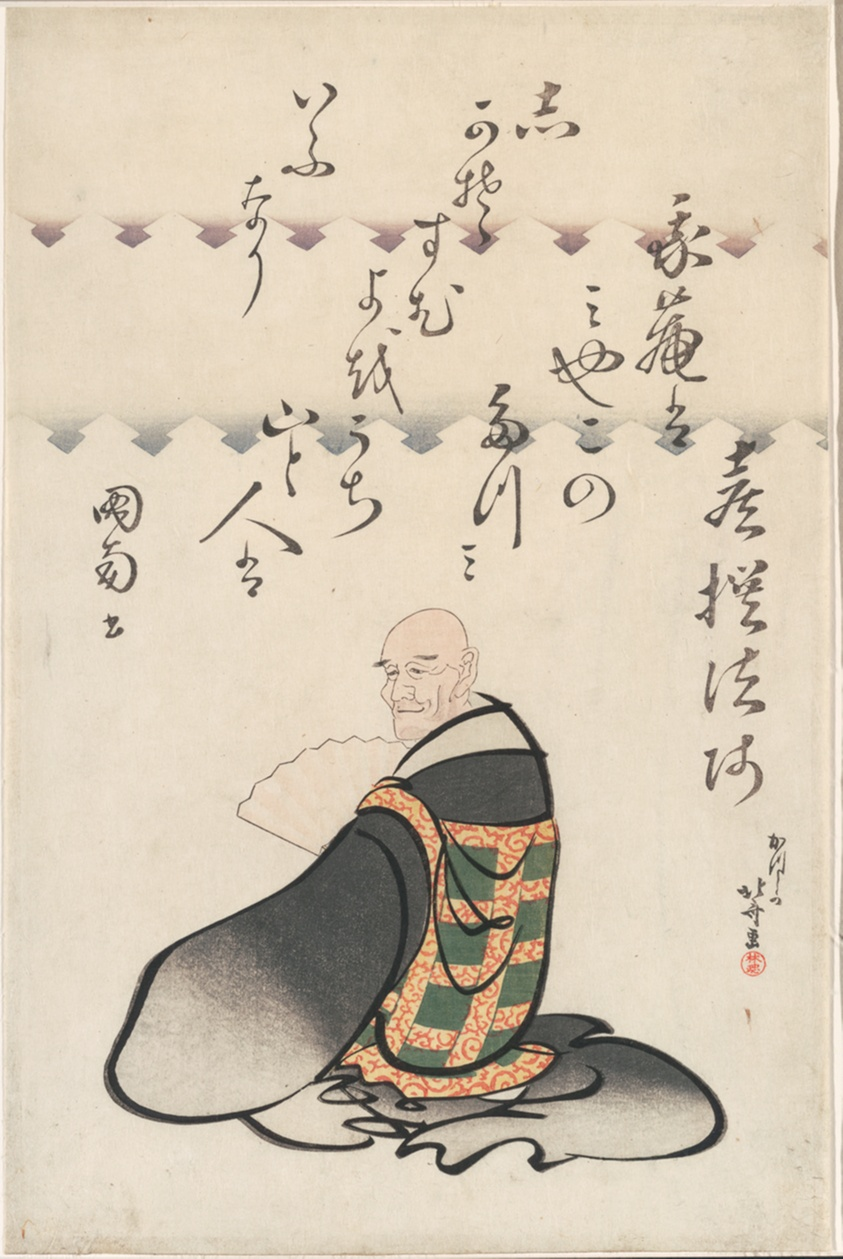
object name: Print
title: The Poet Kisen Hoshi, from the series Six Immortal Poets (Rokkasen)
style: Japanese (culture or style)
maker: Katsushika Hokusai 葛飾 北斎; Japanese, 1760-1849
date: c. 1810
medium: Color woodblock print; oban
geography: Japan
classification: woodblock print; print; asian art